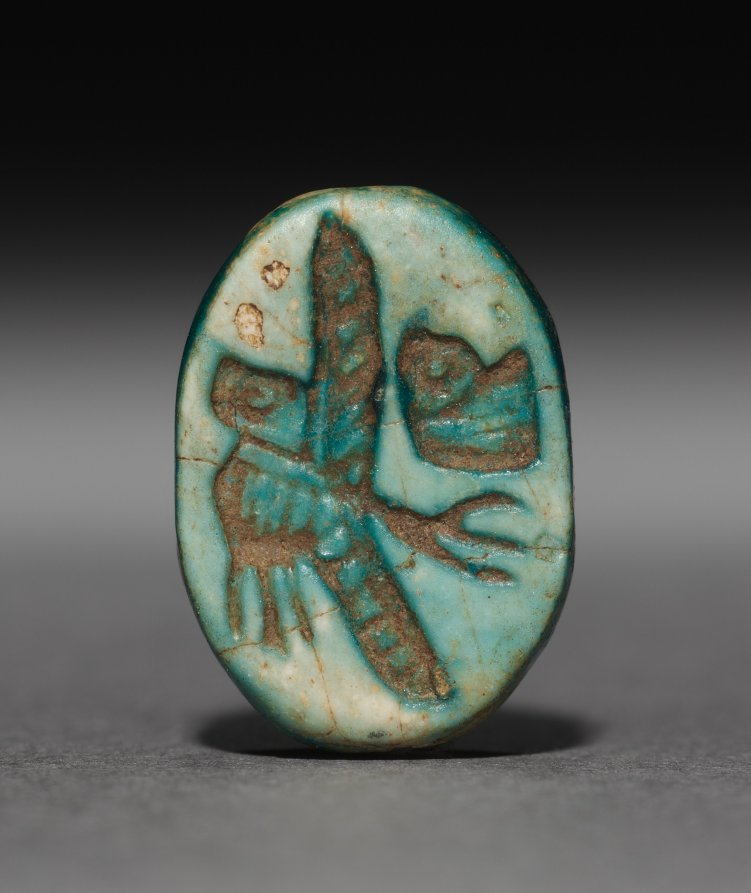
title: Scarab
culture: Egypt, Modern forgery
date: 1900–1914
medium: blue-glazed steatite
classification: Scarabs